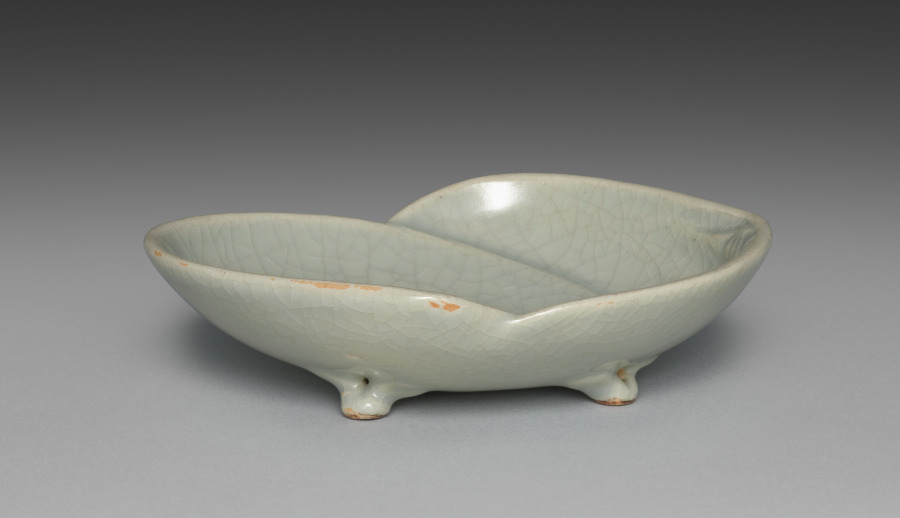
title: Dish from Dishes with Matching Shells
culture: Japan, Meiji period (1868–1912)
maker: Seifū Yohei III (Japanese, 1851–1914)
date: 1893–1914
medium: One of a pair of dishes; porcelain with celadon glaze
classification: Ceramic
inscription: 清風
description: Yohei III’s main output for his sophisticated clientele was in the form of tea sets and dining sets. He created a range of dishes in green glazes. He often produced in pairs, sets of five, or sets of ten. This pair of shell dishes have a box lid interior attestation by Yohei IV that the dishes were made by Yohei III with a cracked-ice (hyōretsu) pattern in the glaze, omitting reference to any glaze coloration.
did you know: These shell-shaped dishes are of the saucer type, suitable for dipping sauces.